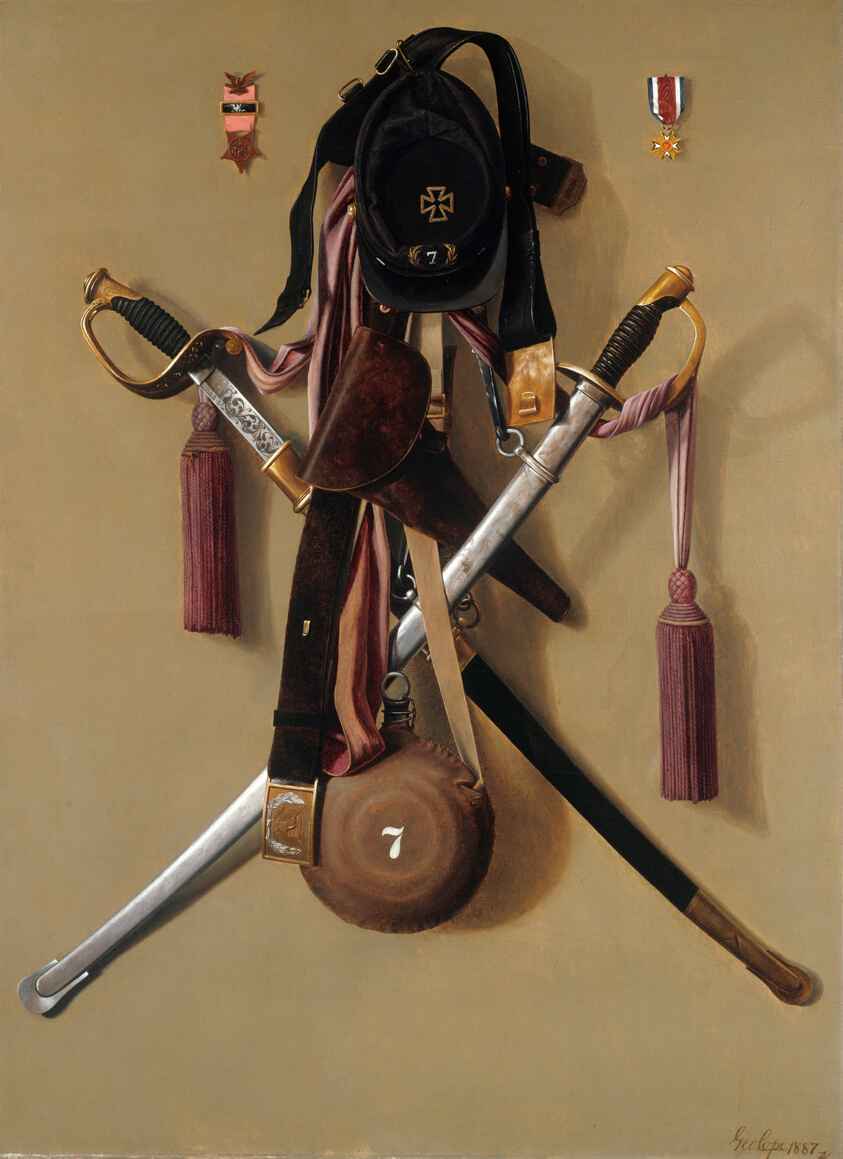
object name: Painting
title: Civil War Regalia of Major Levi Gheen McCauley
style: Realism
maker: George Cope (American, 1855–1929)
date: 1887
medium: Oil on canvas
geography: United States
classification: painting; american arts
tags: military, medals, swords, regalia